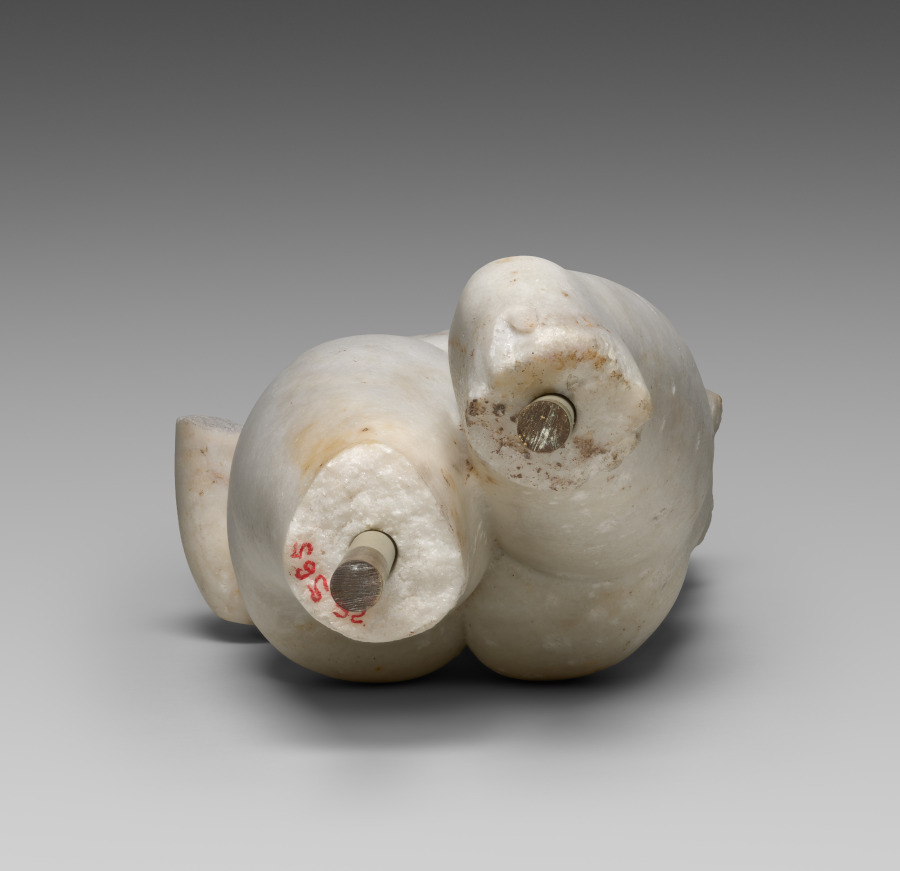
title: Torso of Venus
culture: Roman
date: 1–200 CE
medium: marble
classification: Sculpture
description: As avid collectors of Greek art, ancient Romans valued sculptures for their aesthetic qualities. This torso of Venus was likely inspired by the popularity of Praxiteles's nude Aphrodite from the Greek city-state of Knidos on the western coast of Asia Minor. Displayed in a circular shrine, it became one of the most celebrated sculptures in classical antiquity.